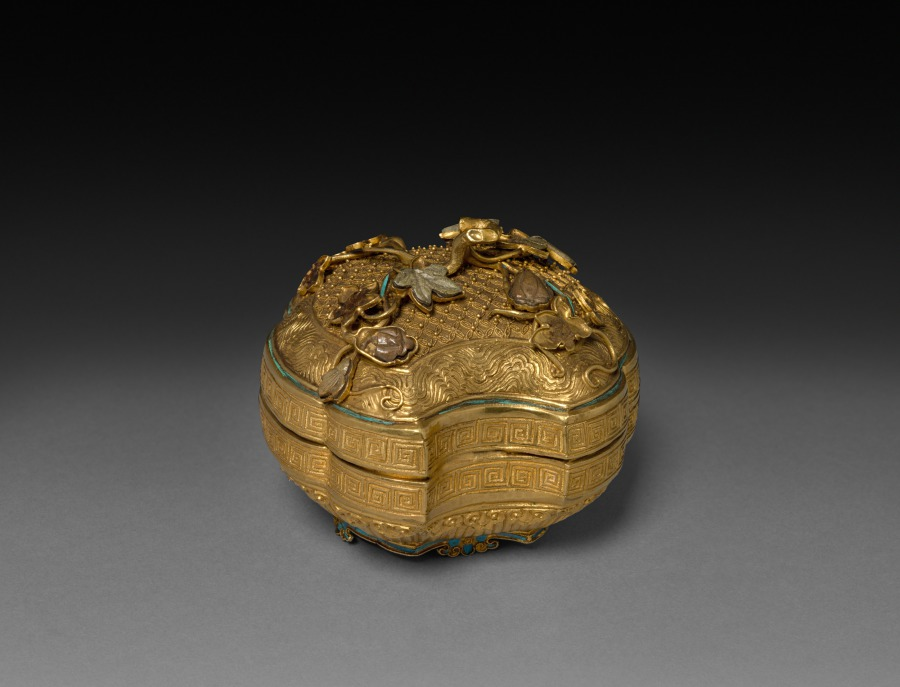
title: Box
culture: China, Qing dynasty (1644–1911)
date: 1800s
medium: silver gilt with kingfisher feather inlay and semi-precious stones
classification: Metalwork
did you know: The box is embellished with blue king-fisher feather inlays.